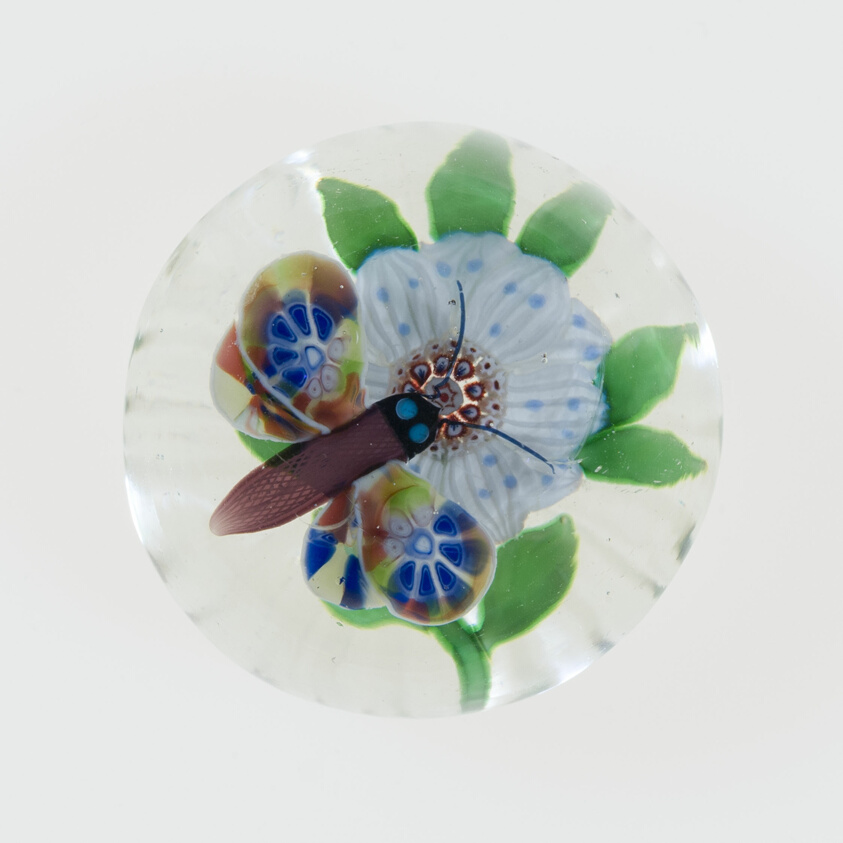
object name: Glass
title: Paperweight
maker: Baccarat Glassworks (Cristalleries de Baccarat); Lorraine, France, founded 1764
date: c. 1848–55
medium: Glass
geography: Lunéville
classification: paperweight; lampwork; european decorative arts; glass